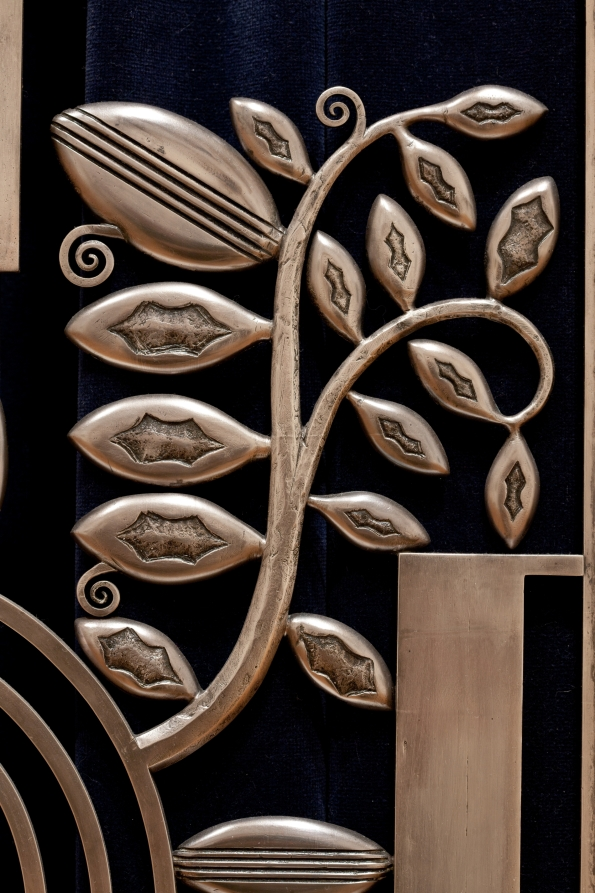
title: Muse with Violin Screen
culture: America, Ohio, Cleveland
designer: Paul Fehér (American, born Hungary, 1898–1990)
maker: Rose Iron Works (America, Ohio, Cleveland, est. 1904)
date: 1930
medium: Steel, brass; silver and gold plating, cotton velveteen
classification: Metalwork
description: Since the early years of the 20th century, the Rose Iron Works, a Cleveland supplier of architectural ornament, has produced distinguished metalwork. The company’s founder, Martin Rose, was born in Austria-Hungary and studied ornamental metalsmithing in Vienna prior to immigrating to Cleveland in 1902. In the 1920s, he hired a talented young Parisian designer, Paul Fehér, to work for the firm. Fehér’s designs, culminating in this massive screen, brought a modern European sensibility to the Rose Iron Works production. With its geometric patterning, highly stylized and abstracted natural forms, and the central figure reminiscent of the celebrated jazz singer Josephine Baker, this screen reflects the classic motifs of Art Deco design.